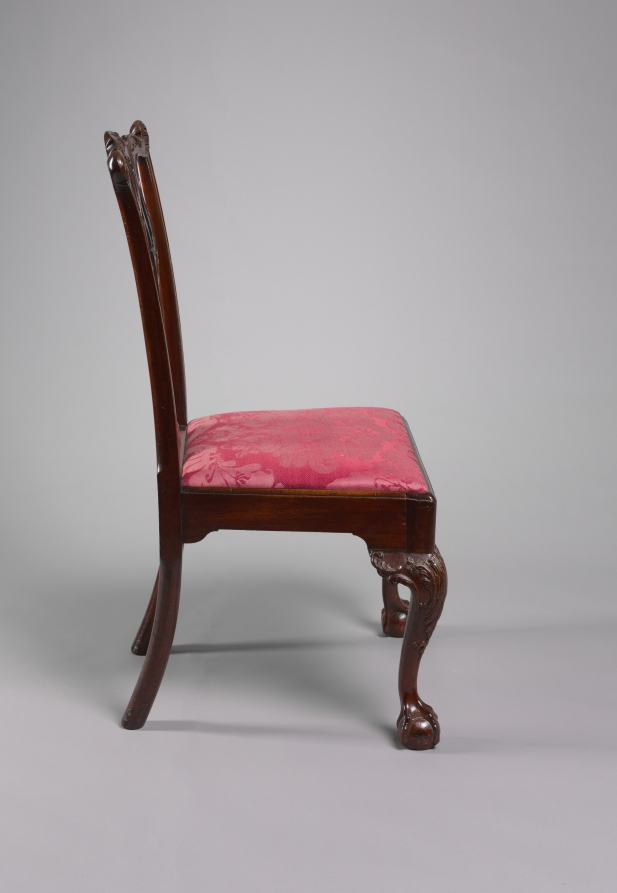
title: Side Chair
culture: America, Pennsylvania, Philadelphia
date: c. 1770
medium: mahogany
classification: Furniture and woodwork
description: The middle section, or splat, of this chair back, with its Gothic pointed arches, may be related to the style invented by the English cabinetmaker Thomas Chippendale. English chairs of this pattern are known, so the design probably originated there and was transmitted to this side of the Atlantic, perhaps by means of an imported example. This chair comes from a set made for Thomas and Elizabeth Edwards of Philadelphia, a furniture making center famous for its carved ornament. This chair features several finely and naturalistically carved details.